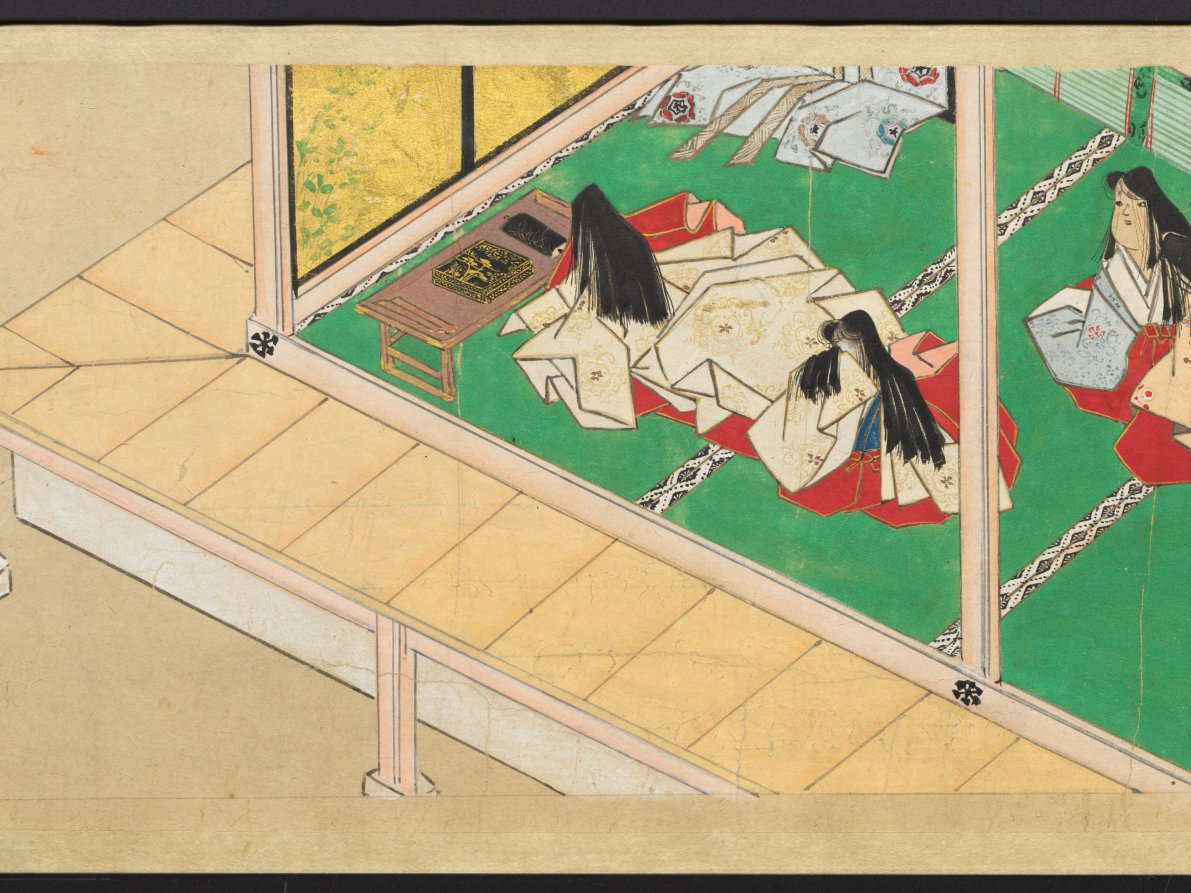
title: The Saltmaker's Story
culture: Japan, Edo period (1615–1868)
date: early 1600s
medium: One of a pair of handscrolls; ink, color, and gold on paper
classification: Painting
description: Once read and copied by girls at New Year’s celebrations and included in dowries, The Saltmaker’s Story is a rags-to-riches tale in which daughters are gifts from the gods. Despite his simple outlook, the main character progresses from humble roots as an associate at Kashima Shrine to the elite status of grandfather of the emperor through the intervention of the Kashima deity. The Saltmaker’s Story is traditionally presented in a set of three scrolls, but the text of this set has been removed by a previous owner, who remounted the illustrations as a pair. The paintings of this one take us from right to left through the first half of the tale.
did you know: This handscroll originally had texts before its paintings, but the texts were removed.